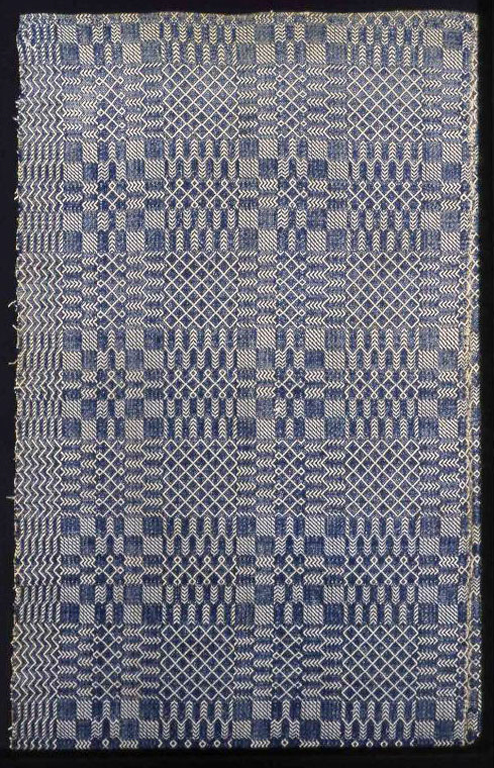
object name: Textile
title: Coverlet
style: 19th century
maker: United States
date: 1825/35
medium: Cotton and wool, composite point twill weave (multiple shaft); two loom widths joined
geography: United States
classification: weaving - coverlet; coverlet; textile; weaving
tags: geometric motif, zigzags, rectangles, squares, geometric, coverlet